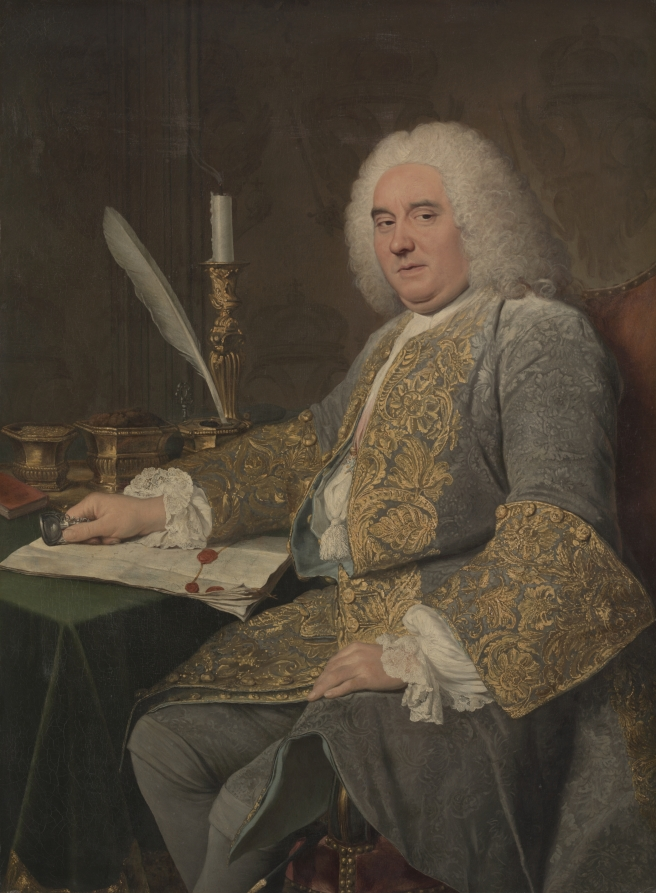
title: Portrait of Jean-Gabriel du Theil at the Signing of the Treaty of Vienna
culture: France, 18th century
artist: Jacques André Joseph Aved (French, 1702–1766)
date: 1738–40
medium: oil on canvas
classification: Painting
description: As secretary of foreign affairs for Louis XV of France, Jean-Gabriel du Theil (1685–1755) helped negotiate the 1738 Treaty of Vienna, which ceded the Duchy of Lorraine to France. The seal du Theil holds in his hand, the silver-gilt writing set, and the thick document all allude to these negotiations, while the wisp of smoke rising from the candle used to melt the sealing wax suggests that the treaty has only just concluded. Du Thiel’s relaxed posture conveys calm assurance, but his sharp gaze is that of a shrewd negotiator. A costume encrusted with gold embroidery and (just visible at his chest) the pink ribbon and star of the royal Order of Saint Lazarus, are visible manifestations of du Theil’s prestigious position.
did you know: Smoke rising from the candle suggests that du Theil has just added his molten wax seal to the document before him.